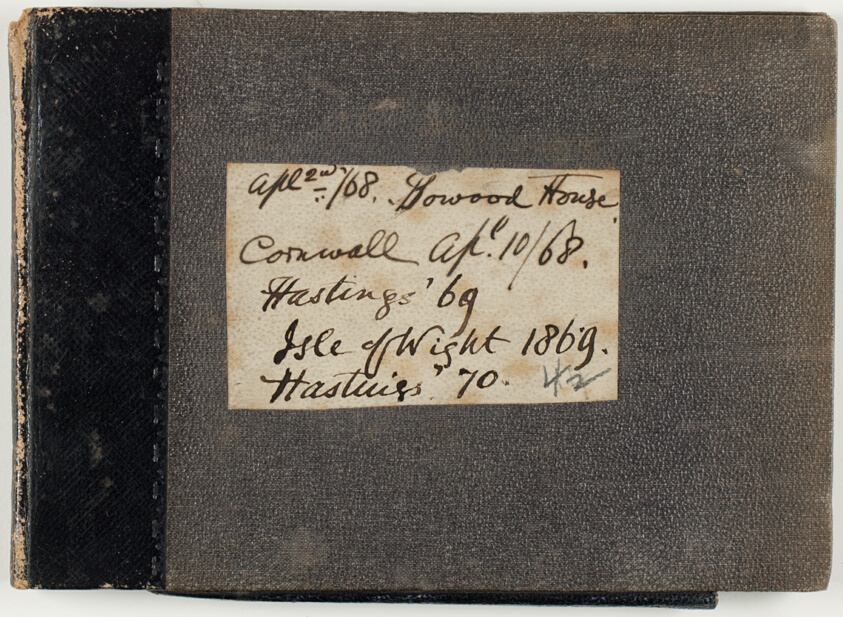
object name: Book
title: Cornwall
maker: Charles George Lewis (English, 1808-1880)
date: 1868–69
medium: Sketchbook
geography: England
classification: sketchbook; graphite; prints and drawing; book